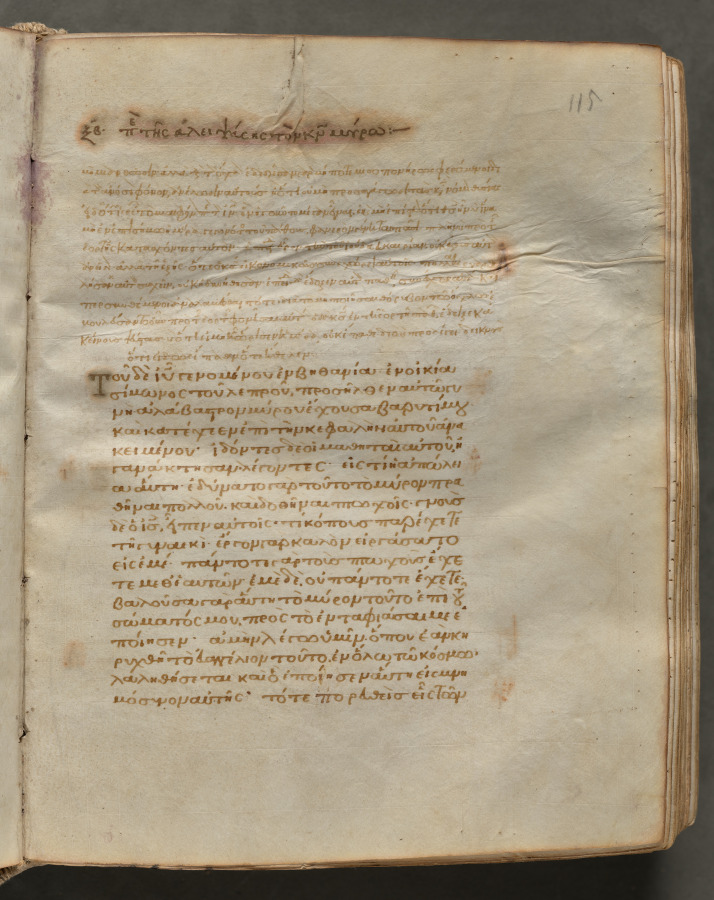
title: Text, folio 115 (recto), from a Gospel Book with Commentaries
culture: Byzantium, Constantinople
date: c. 1000–1100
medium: ink, tempera, and gold on vellum; leather binding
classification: Bound Volume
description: Each of the four gospels in this book opens on a page with brilliantly illuminated borders depicting the author of the text as well as birds-principally peacocks, symbols of the immortality of the soul-and fountains, representing the fountain of life and the salvation of the soul. This volume consists of 428 leaves with texts in Greek. Its level of sophistication suggests that it was probably written and decorated in a monastery in Constantinople.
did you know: Gospel Books were carried in procession through Byzantine churches.